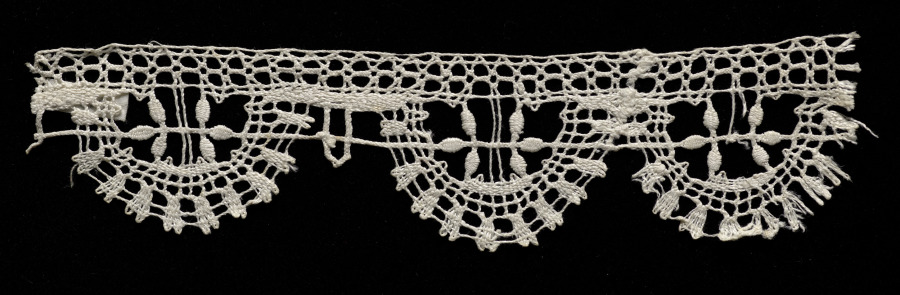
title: Lace Edging of Bell Points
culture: Italy, Genoa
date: 1600s–1700s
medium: Bobbin lace (rose lace)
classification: Lace